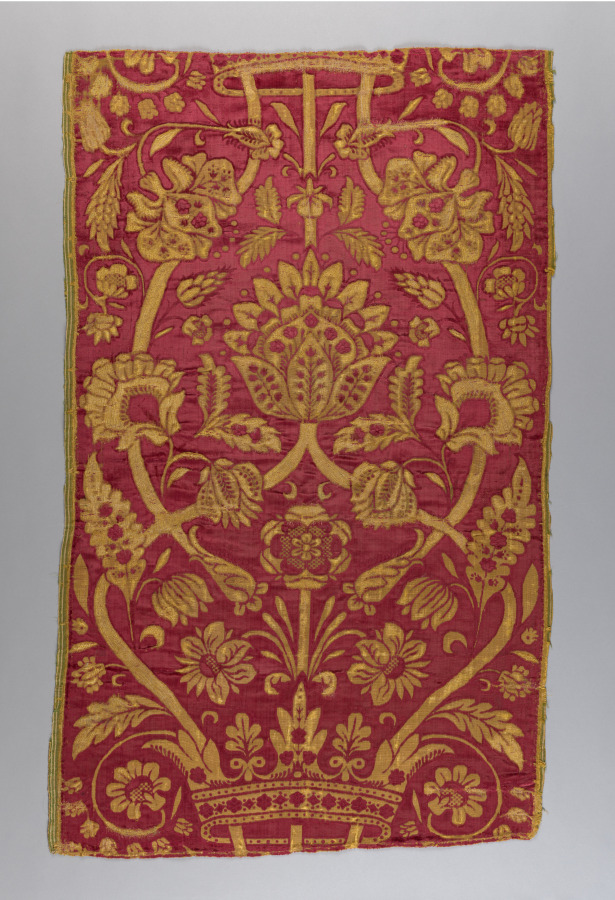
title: Velvet Cover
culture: Italy, Genoa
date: 1600s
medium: velvet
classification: Velvet